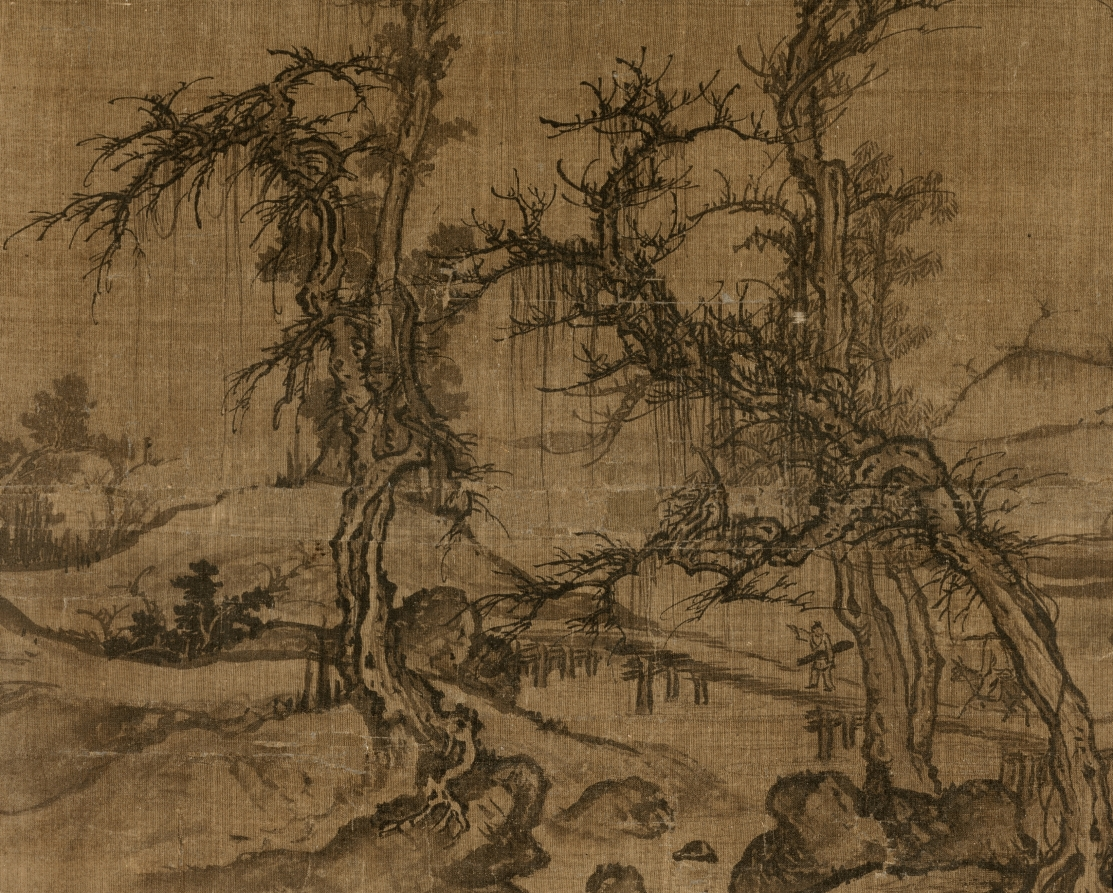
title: Carrying a Qin on a Visit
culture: China, Yuan dynasty (1271-1368)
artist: attributed to Luo Zhichuan (Chinese, active 1280s–1320s)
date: 1271–1368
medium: hanging scroll (now paneled), ink on silk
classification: Painting